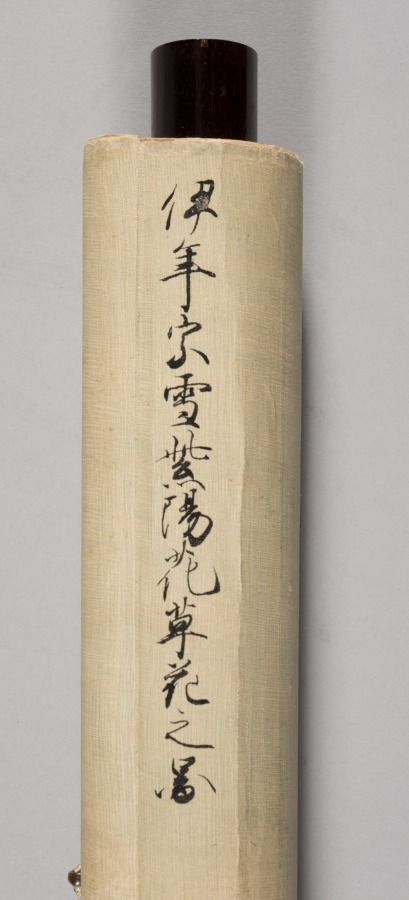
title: Summer Flowers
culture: Japan, Edo period (1615–1868)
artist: Kitagawa Sōsetsu (Japanese, active 1639–50)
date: mid-1600s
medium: hanging scroll; ink, color, and gold on paper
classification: Painting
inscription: 法橋相説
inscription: Seal: 印年 (Inen)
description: White hydrangea, orange-colored demon’s lantern, and greenbrier vine appear together in this scroll. The artist used the dripping-in (tarashikomi) technique to create a sense of depth and dimension in the leaves of the plants. A carefully controlled brush loaded with a high ratio of water to ink or color is key to the success of this brush method. Gold lines indicate the veins of leaves and the seams of pods.